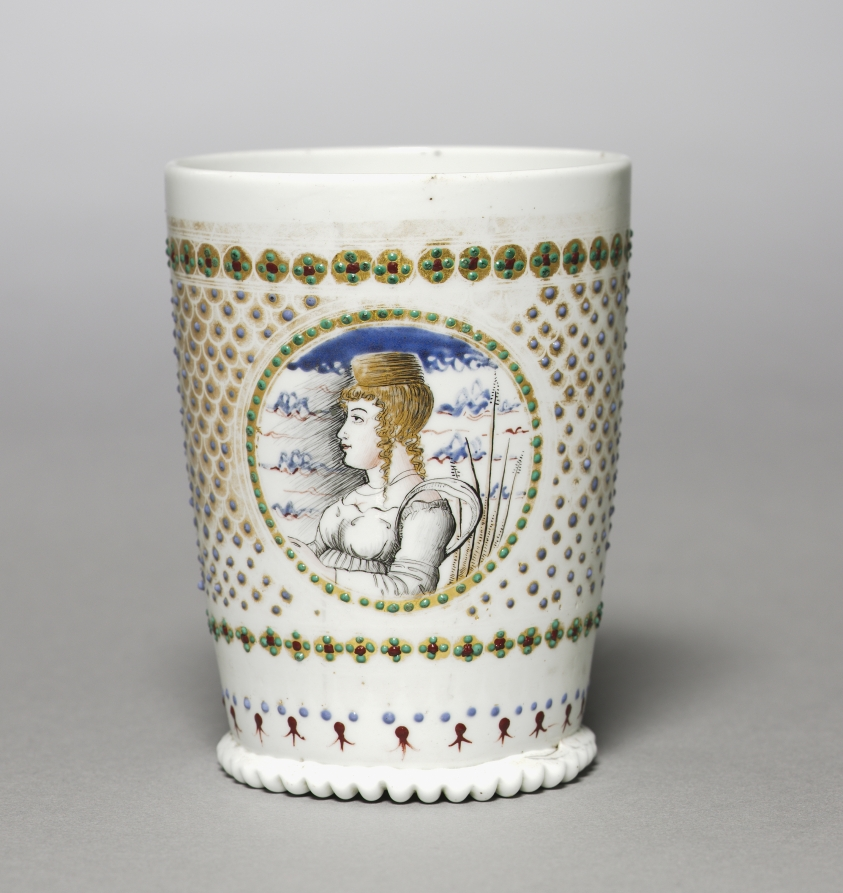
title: Marriage Beaker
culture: Italy, Venice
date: late 1400s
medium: opaque glass (milk glass or lattimo), enameled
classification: Glass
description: By the mid-1400s the word lattimo had come to mean glass made milk-like by the addition of opacifying materials, such as an oxide of tin. It was imitative of Chinese porcelain. Only fourteen surviving pieces of lattimo vessels are recorded. These beakers may have been intended as betrothal or wedding gifts. This one is enameled with idealized portrait heads of a young man and woman. Such portrait heads of young women were also a feature of Italian Maiolica, especially those at Deruta (see "love dishes" in Gallery 219).